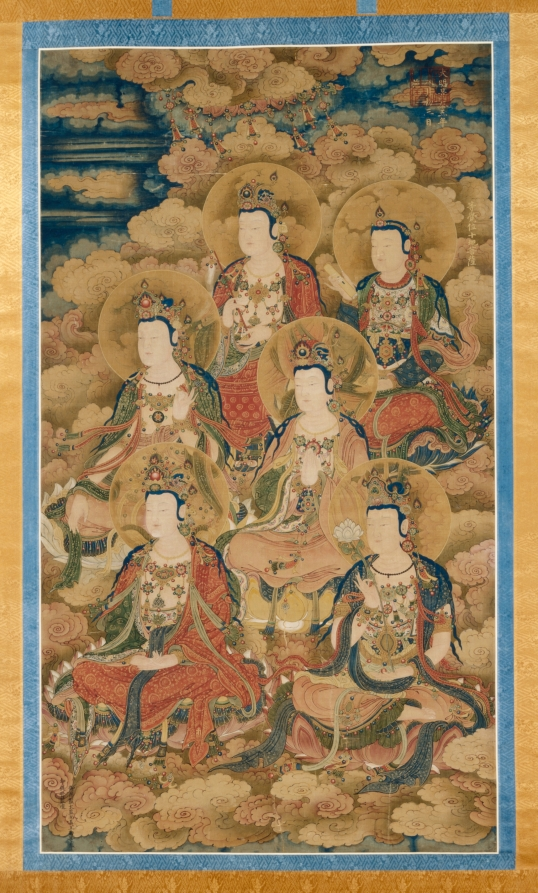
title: The Bodhisattvas of the Ten Stages in Attaining the Most Perfect Knowledge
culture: China, Ming dynasty (1368–1644)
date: 1454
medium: hanging scroll; ink and color on silk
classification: Painting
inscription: 大明景泰五年八月初三日施 [印] 廣運之寳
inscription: 御用監太監尚義王勤等奉命提督監造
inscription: 等覺位十地菩薩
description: This painting represents bodhisattvas of the 10 stages of enlightenment undergoing the final processes toward Buddhahood. This and CMA 1973.70.2 form part of a set of scrolls that were used to perform the Water-Land (shuilu) ritual. The sinuous curves of scarf and drapery, the layering of garments, and the minute detail all reflect the opulent visual atmosphere that surrounded the Ming worshipper in temples and spirit halls throughout the country. In the upper right corner of each painting is an imperial seal and an inscription in gold: Donated on the third day of the eighth month in the fifth year of the Jingtai reign (1454) of the Great Ming. Written in ink in the lower left corner is the record that they were made on imperial order, probably to present them to the Da Longfu monastery in Beijing.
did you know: This painting was used in the grandest of the Buddhist mortuary rites, the Water-Land (shuilu) ritual, which was conducted for the salvation of “all souls of the dead on land and sea.”